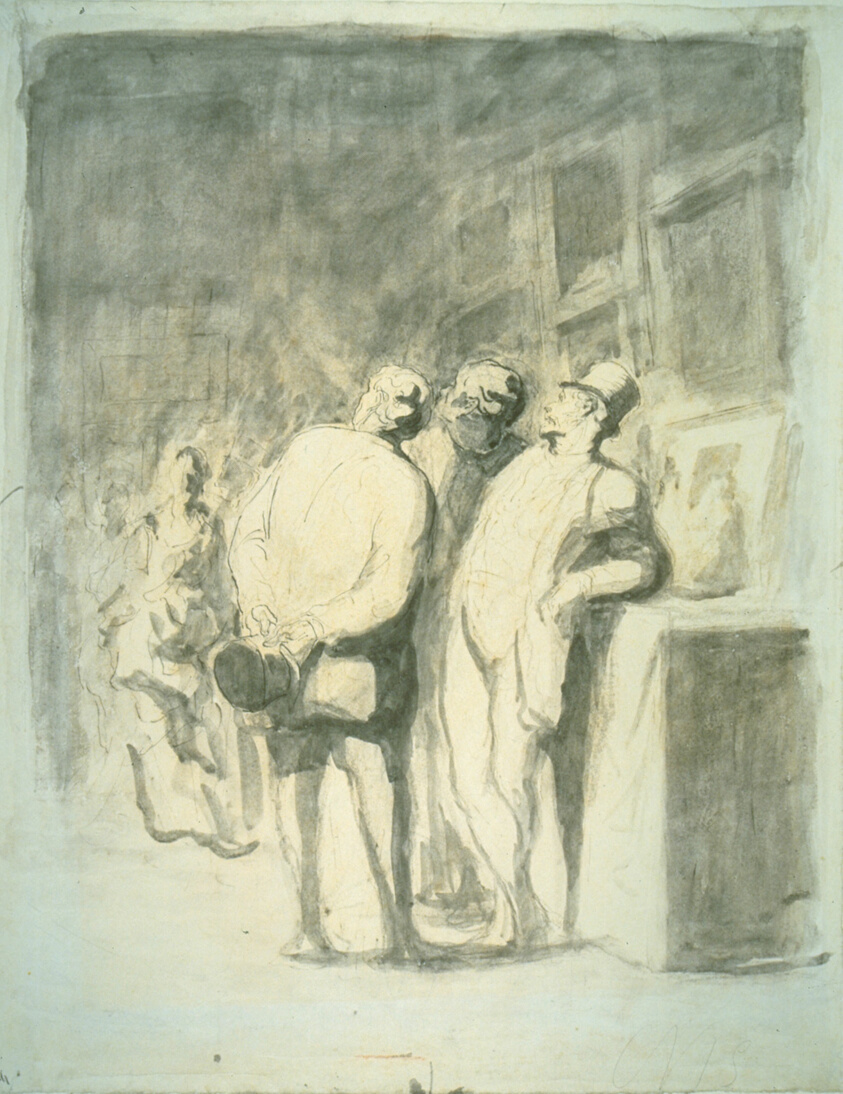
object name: Drawing and Watercolor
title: The Three Connoisseurs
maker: Honoré Victorin Daumier; French, 1808-1879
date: after 1869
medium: Pen and black ink, with brush and black and gray wash, over traces of charcoal, on ivory wove paper (discolored to cream)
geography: France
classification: pen and ink drawings; drawings (visual works); prints and drawing